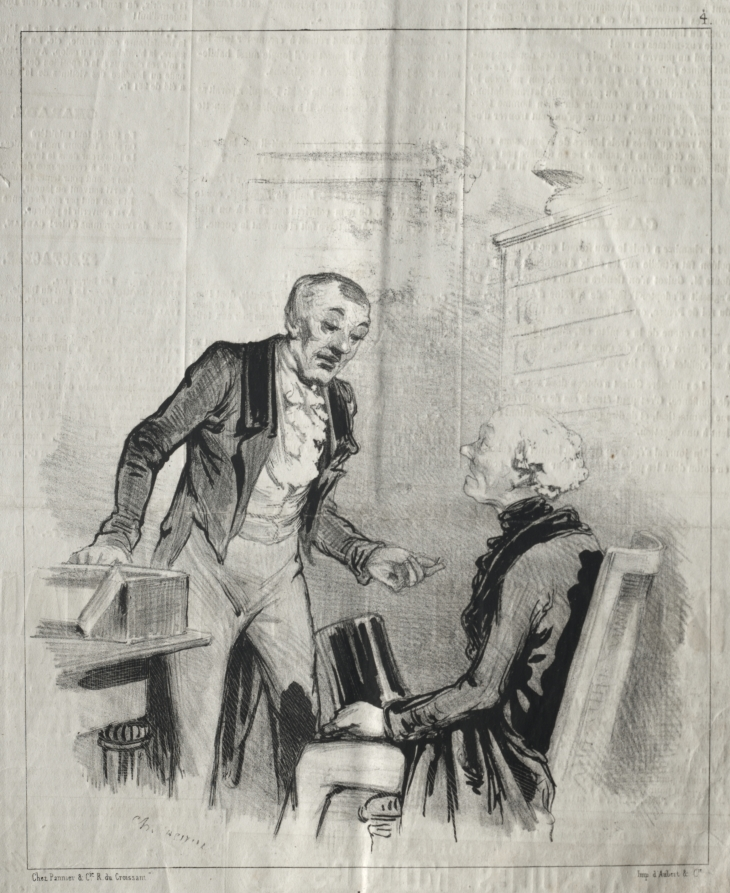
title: Les Malades et les medicins: No. 4, Lew Homéopathes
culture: France, 19th century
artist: Cham (French, 1818–1879)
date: 1800s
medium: lithograph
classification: Print